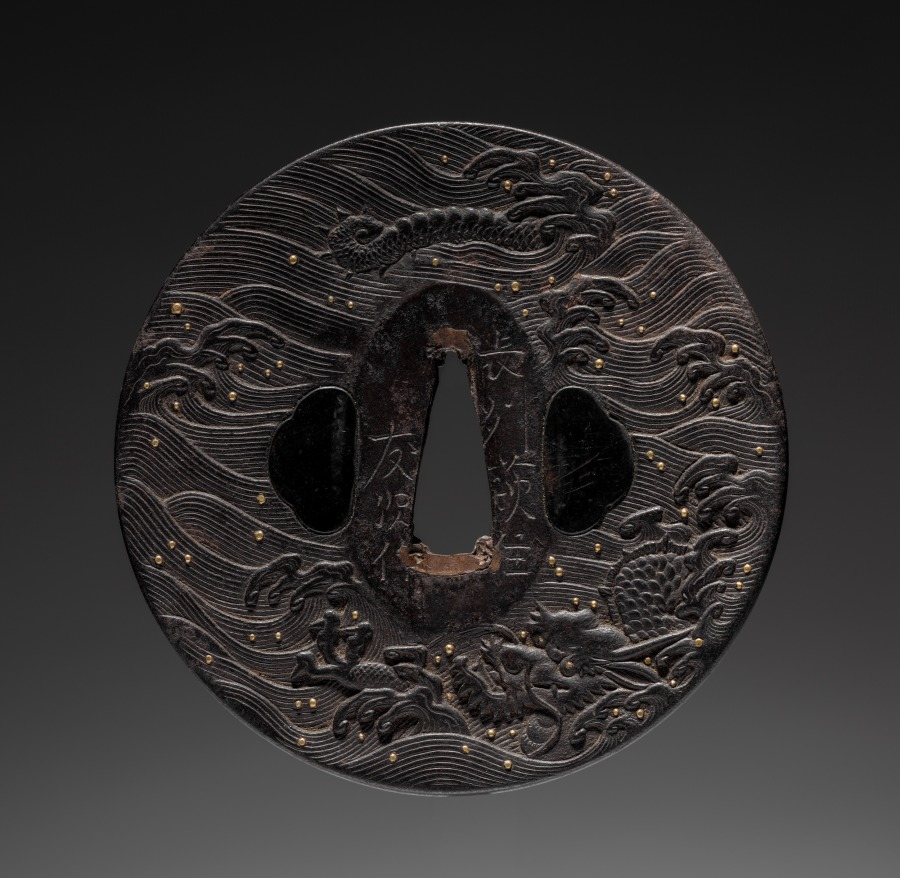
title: Sword Guard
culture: Japan, Edo period (1615–1868)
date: late 1600s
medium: iron with gold inlay (Choshu type)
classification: Arms and Armor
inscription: signed "Tomotsugu, residing at Hagi, Nagato province, made."